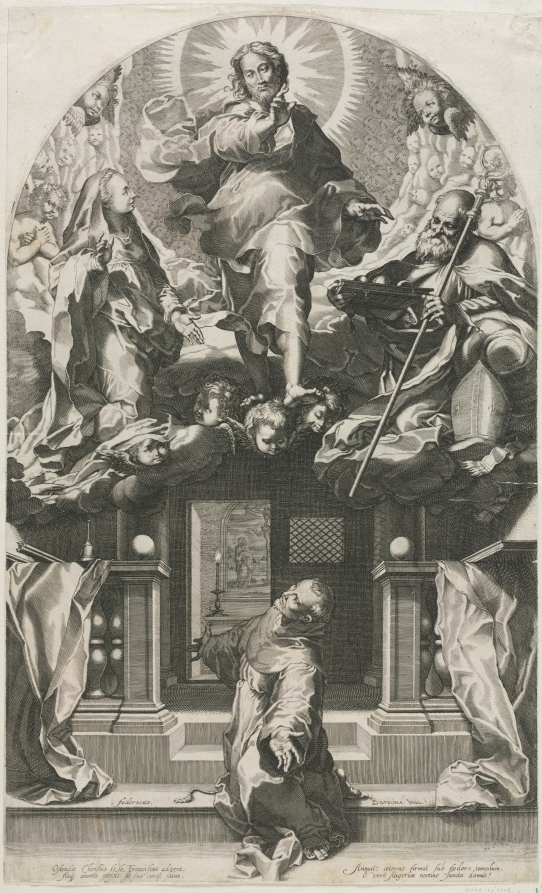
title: The Ecstasy of St. Francis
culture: Italy, 16th century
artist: Francesco Villamena (Italian, 1566–1624)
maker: after Federico Barocci (Italian, 1528–1612)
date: 1588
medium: engraving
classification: Print